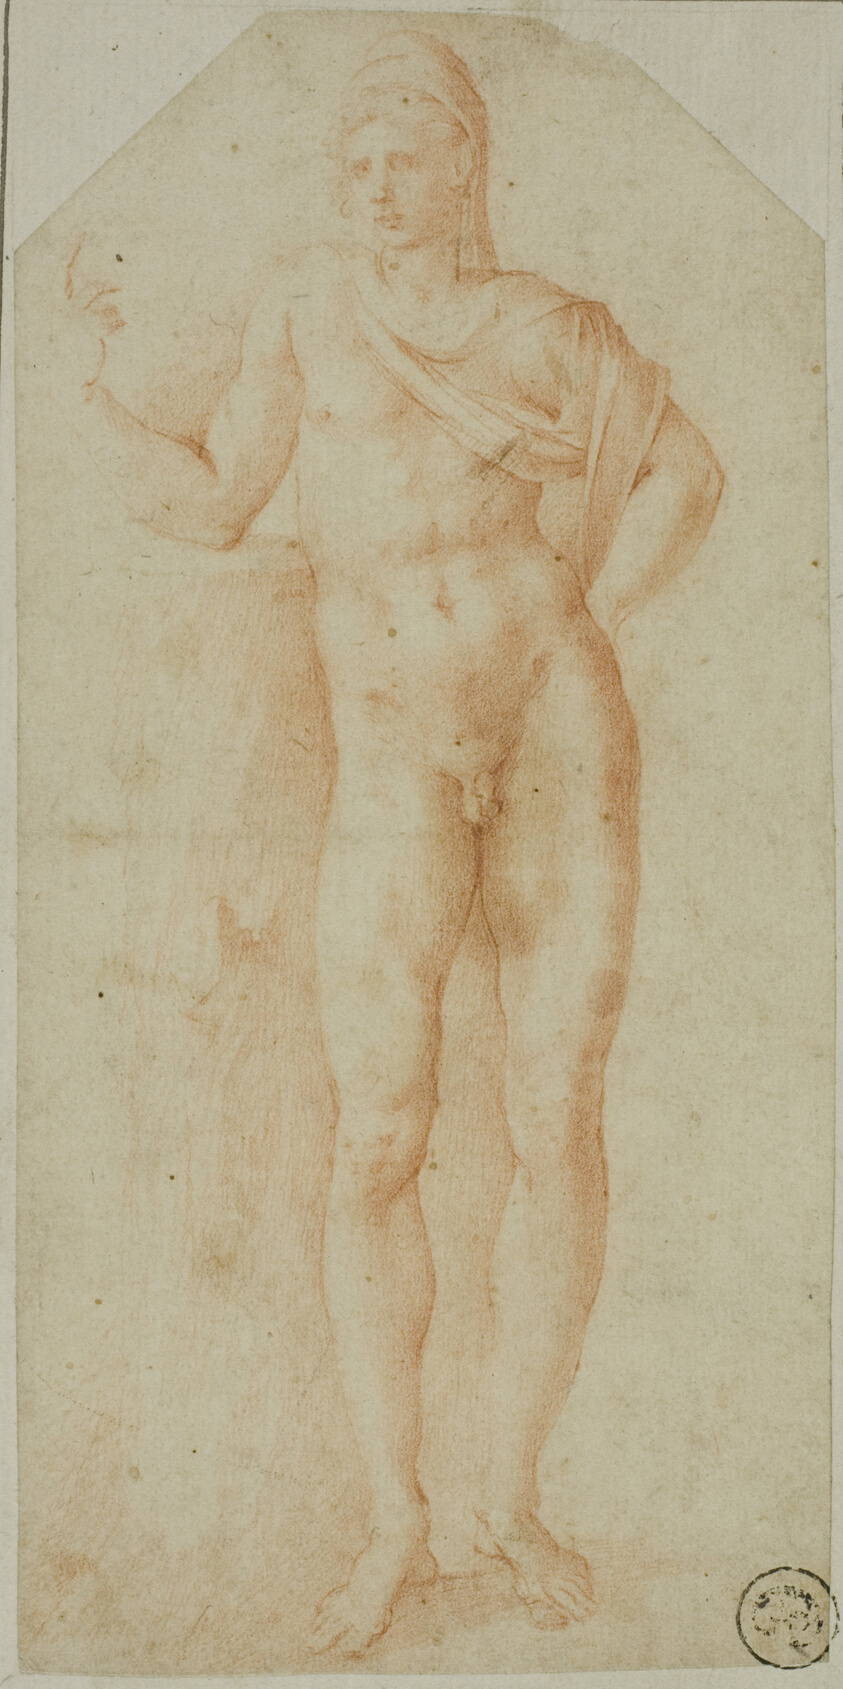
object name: Drawing and Watercolor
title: After the Antique: Statue of Paris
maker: Attributed to Giulio Clovio; Croatian, active Italy, 1498–1578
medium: Red chalk on ivory laid paper, laid down on off-white laid card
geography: Italy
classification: chalk; drawings (visual works); prints and drawing